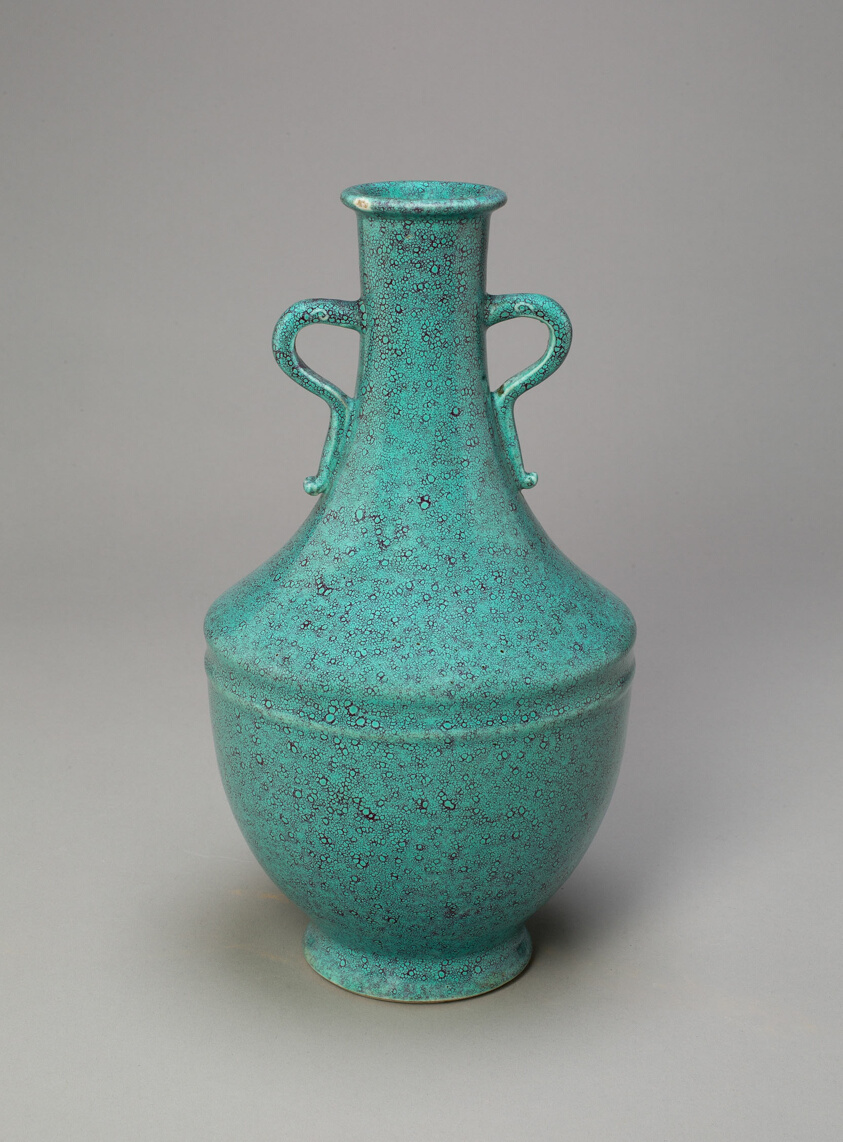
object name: Vessel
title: Bottle Vase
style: Chinese (culture or style)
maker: China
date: Qing dynasty (1644–1911), Qianlong reign mark and period (1736–95)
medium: Porcelain with blue glaze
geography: China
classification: vase; vessel; porcelain; asian art; ceramics